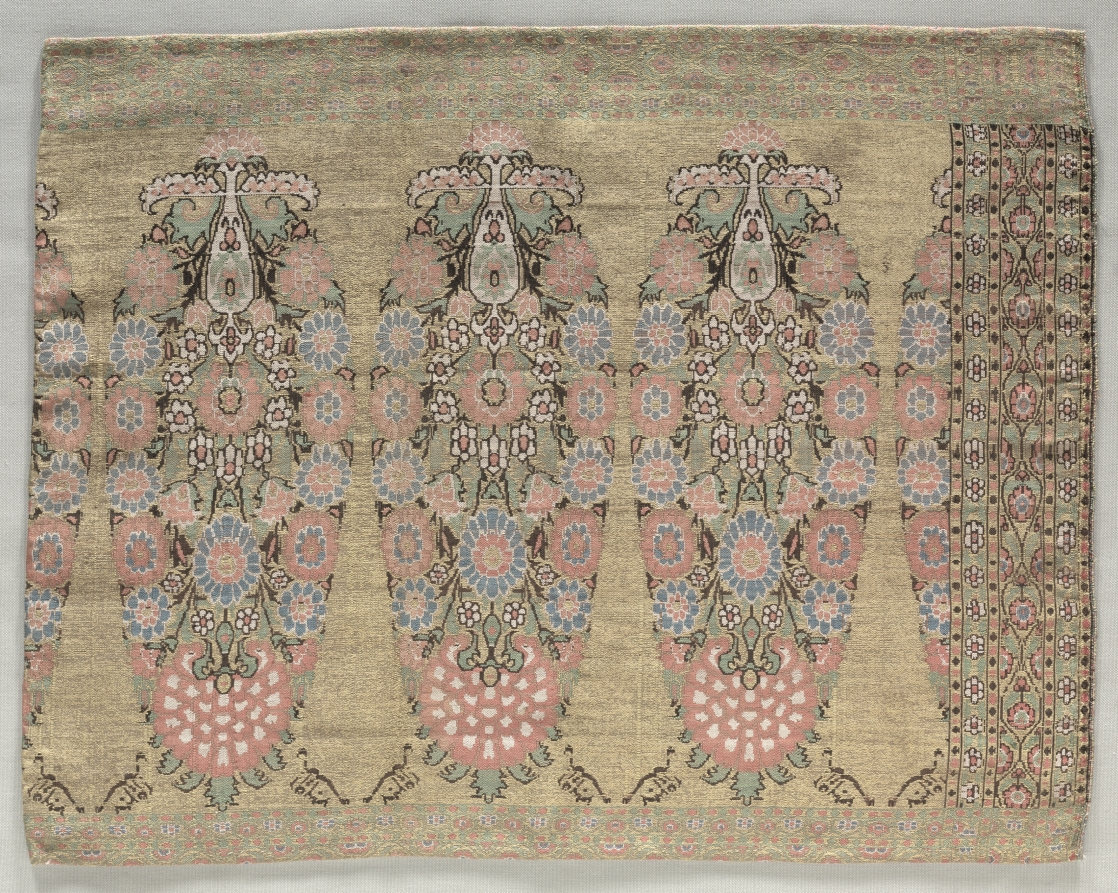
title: Two Pieces from a Scarf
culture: Iran, 18th century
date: 1700s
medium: brocade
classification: Textile